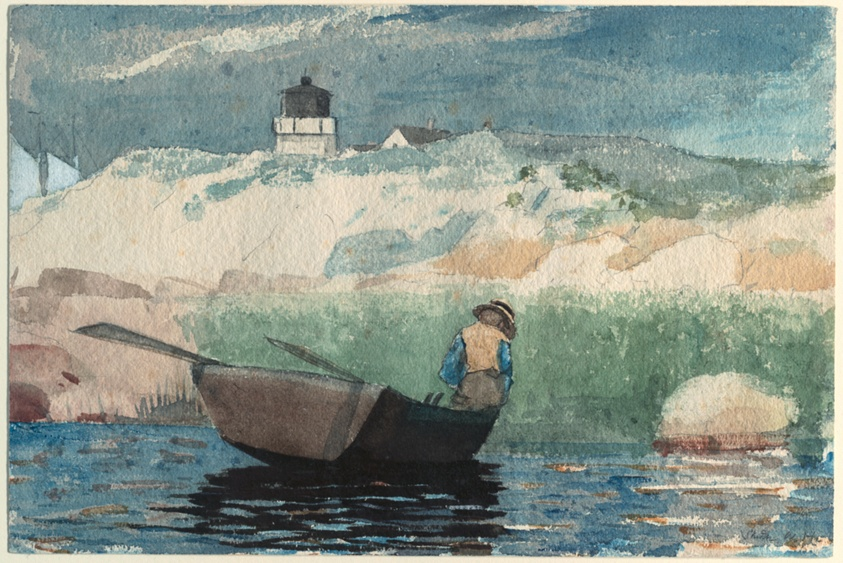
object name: Drawing and Watercolor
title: Boy in Boat, Gloucester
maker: Winslow Homer (American, 1836-1910)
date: 1880/81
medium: Transparent watercolor, with touches of opaque watercolor and scraping, over graphite, on moderately thick, rough-textured, ivory wove paper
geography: United States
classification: watercolor; drawings (visual works); prints and drawing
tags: seascapes, children, people, boats, Century of Progress, world's fairs, Chicago World's Fairs